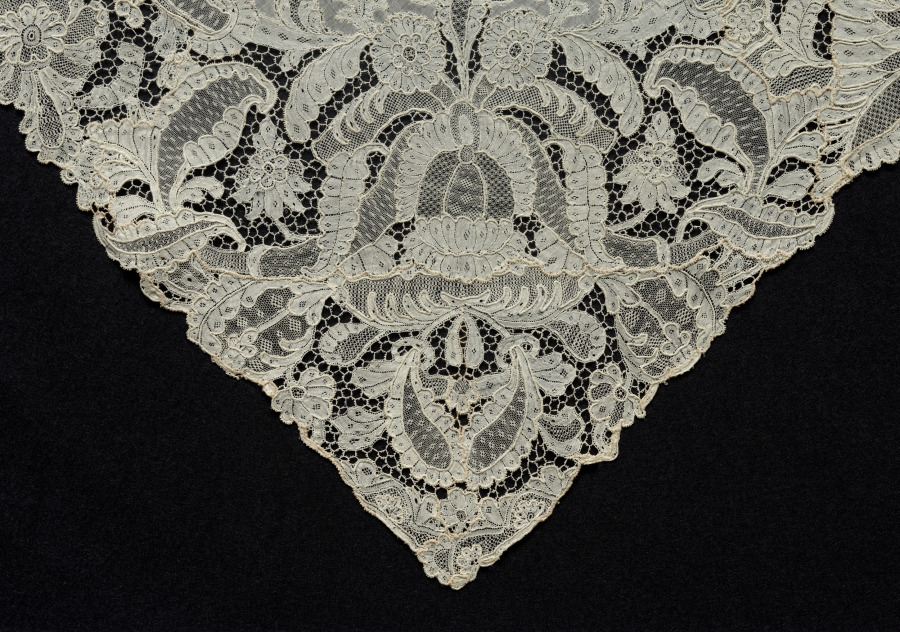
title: Lace Handkerchief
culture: France, Alençon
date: 1740–60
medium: Plain weave linen center with needle lace (Point d'Alençon) border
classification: Lace